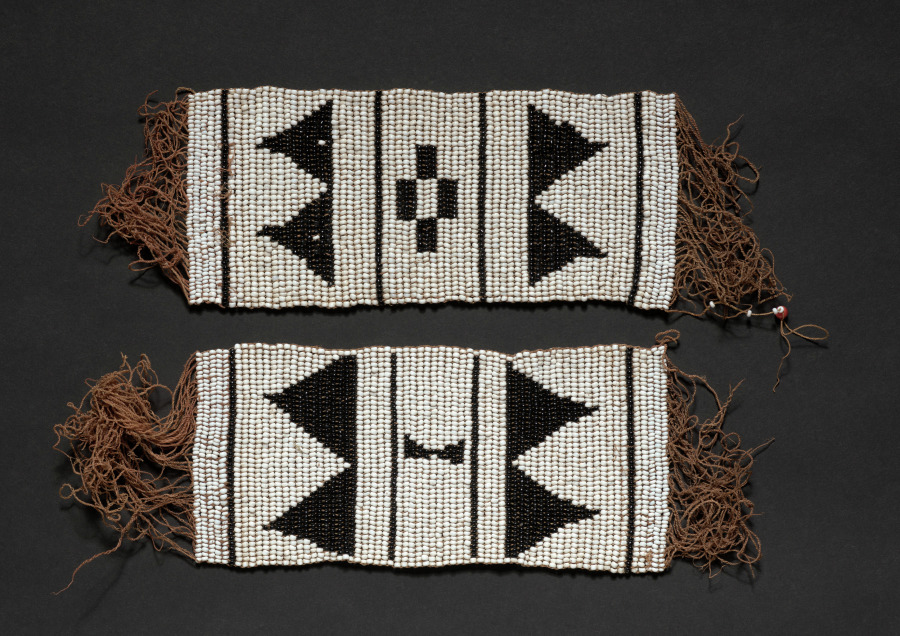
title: Royal ceremonial beadwork: anklet (izitsaba)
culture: Africa, Southern Africa, South Africa, Southeast Cape Region, Unknown female Xhosa-style maker(s)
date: 1800s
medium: Glass beads and sinew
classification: Mixed Media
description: Elite Xhosa women once wore beaded garments like this on festive occasions. Made almost completely from imported Venetian or Bohemian glass beads, they were overt status symbols. Imported beads functioned as money for the Xhosa between circa 1770 and 1829. These garments’ female maker carefully selected beads of the highest quality, uniform in color, shape, and size.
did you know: The beads to make an ensemble like this cost several cattle in the early 1800s, an amount most couldn't afford.